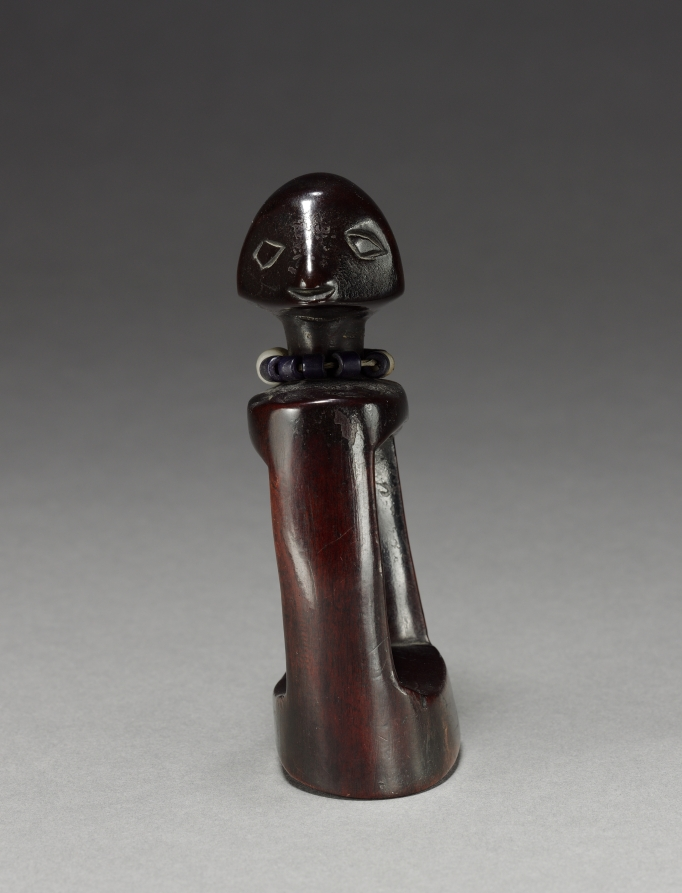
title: Divination Implement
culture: Africa, Central Africa, Democratic Republic of Congo, Luba-style maker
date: late 1800s–early 1900s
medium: Wood, glass beads, and natural fiber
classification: Sculpture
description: This device helped contact an ancestral spirit who clarified misfortunes. The diviner awakened the ancestor by anointing the rectangular frame of the figurine with pungent basil leaves. Sitting on a textured woven mat, the diviner held one side of the instrument while the client held the other. The diviner then posed questions to the ancestor who responded through certain movement signaling affirmation.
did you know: This divination implement is a kakishi (embodiment of an ancestor) device that connects the diviner and the client to the spirit they wish to contact.